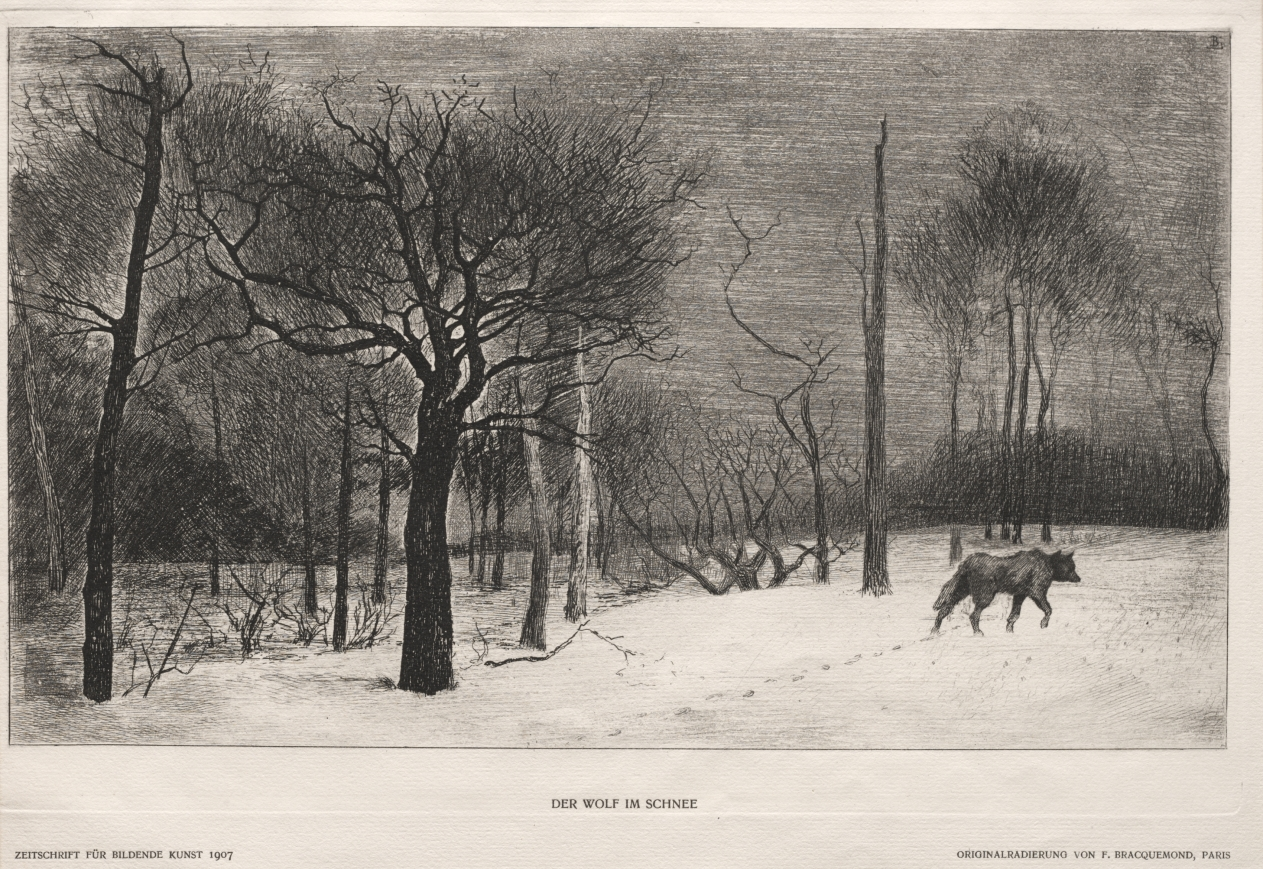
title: Winter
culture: France, 19th cenury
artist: Félix Bracquemond (French, 1833–1914)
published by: Bildende Kunst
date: 1862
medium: etching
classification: Print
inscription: inscribed lower margin, letterpress: Zeitschrift für Bildende Kunst 1907 original Radierung von F. Braquemond, Paris